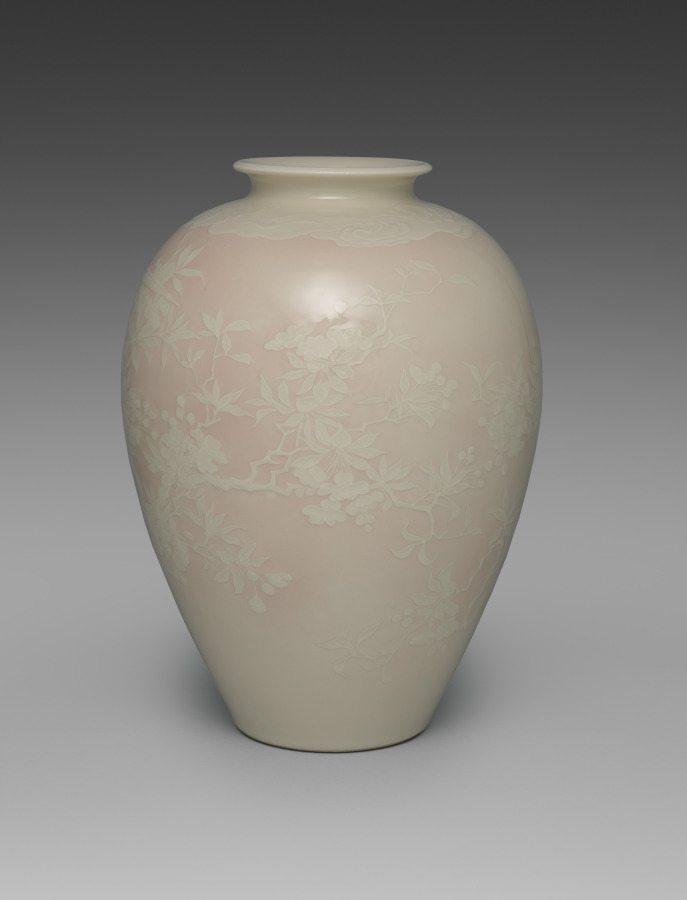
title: Pheasants in Cherry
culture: Japan, Meiji period (1868–1912)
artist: Seifū Yohei III (Japanese, 1851–1914)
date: 1900–1914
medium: Porcelain with molded and carved design, underglaze color, and cream glaze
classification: Ceramic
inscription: 大日本清風造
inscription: 清風製之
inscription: 清風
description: Like the design of Flower Vase with Phoenix in Paulownia (CMA 2022.199), the pair of pheasants in a dramatic landscape setting on this vase was created by adding clay to the surface of the clay body and then molding and carving it. Here, instead of a typical white clay, Yohei III has used an ivory clay. He then added gradated pink around the complex design, which with its multitude of cherry blossoms must have been painstaking to mask with precision. For the birds’ eyes, he added a touch of yellow. He then fired the vase with an allover translucent cream glaze. The resulting kanpakuji piece is one in which an academic subject long favored by painters of the Kano school for screen and sliding door paintings in important buildings, that of impressively sized birds within a scene of precipitous, angled rock faces and twisting trees, is made soft and ethereal while retaining a sense of gravitas.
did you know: The unusually large scale of this piece and the fact that he signed the base “Made by Seifū of Great Japan” also suggest that it was made for public display.